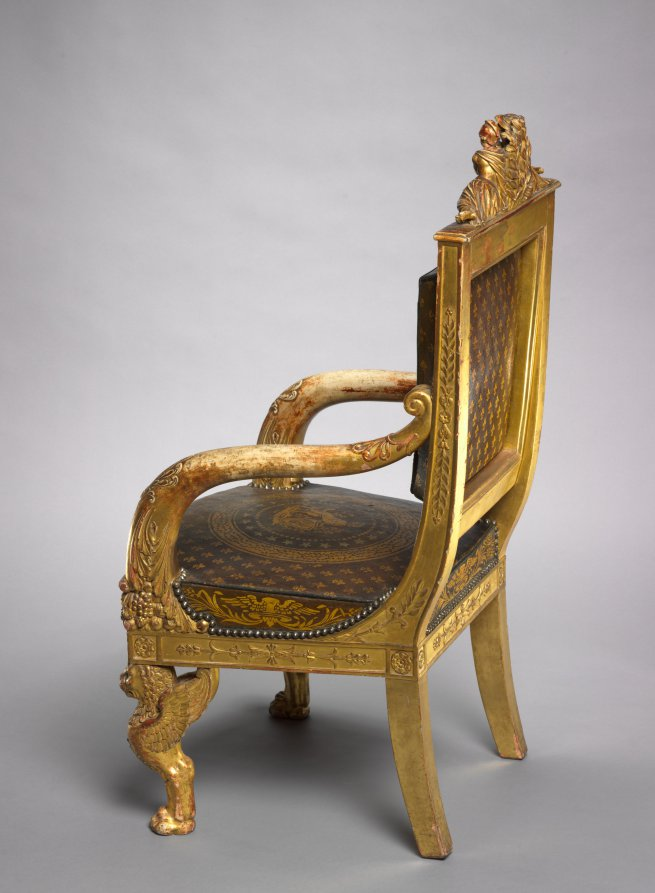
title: Child's Throne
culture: France, Paris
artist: Pierre-Marie Balny le Jeune (French, 1832)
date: 1822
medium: carved and gilded wood, leather upholstery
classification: Furniture and woodwork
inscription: inscribed with stencils inside back rail: BLONDEL TAPISSIER/RUE ST. ANTOINE N 72 1822 inscribed in ink lower edge back rail: 12 JANVIER 18[22?]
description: This chair was made for the young, presumed successor to the French throne who ruled briefly as Henri V in 1830, the last of the direct Bourbon line. He is depicted at the center of the top rail protected by female figures representing France and Minerva, the Roman goddess of wisdom. Fleurs-de-lis and the Gallic rooster, symbols of French royalty and the French people, decorate the upholstery.